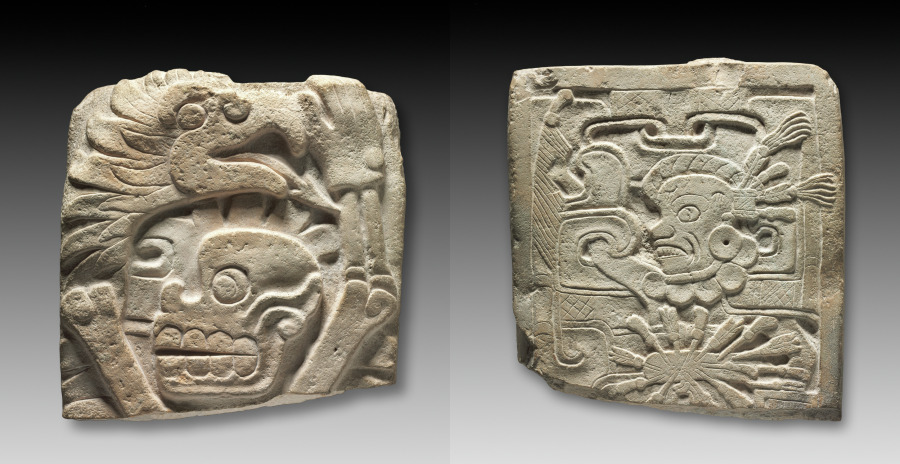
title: Stela Fragment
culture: Mexico, Veracruz?, 600-950 AD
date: 600–950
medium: limestone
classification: Sculpture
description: Figures appear on two sides of this fragmentary stela (upright stone slab carved in relief). One seems to represent a grimacing warrior who brandishes a club; arrow-like darts festoon his belt and hair. On the other side is a skeleton with one fleshed hand, perhaps a sacrificed captive. The eagle with a leaf in its mouth is a hieroglyph that may identify the captive's name.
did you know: The pointed teeth of the warrior are suggestive of dental modification, a practice known to have occurred from human remains.